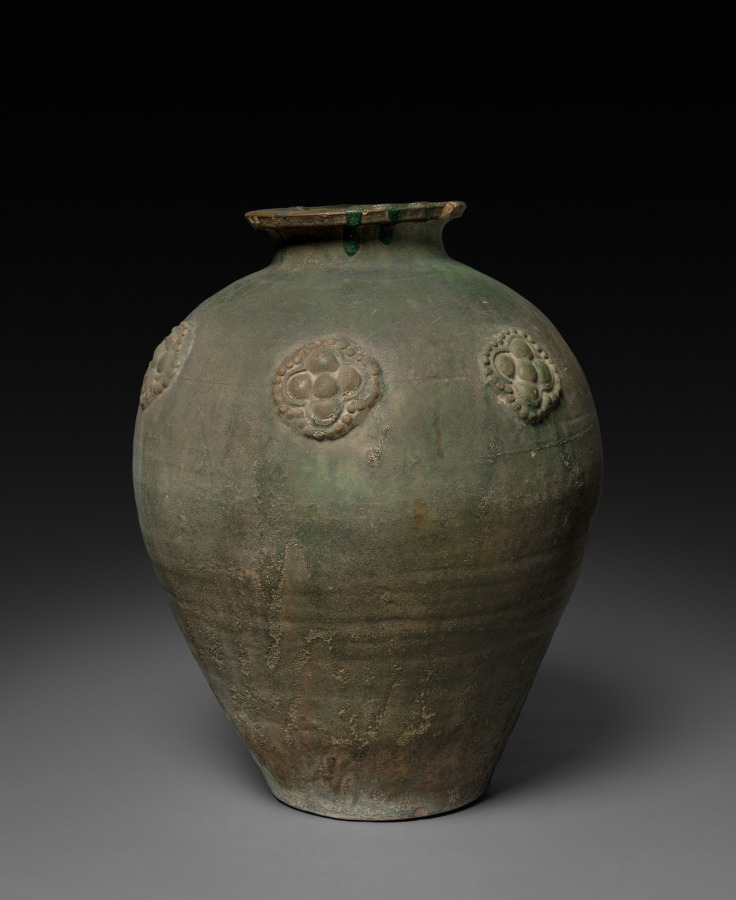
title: Jar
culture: China, Six Dynasties period (265-589) or Sui dynasty (581-618)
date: 500s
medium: glazed earthenware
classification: Ceramic